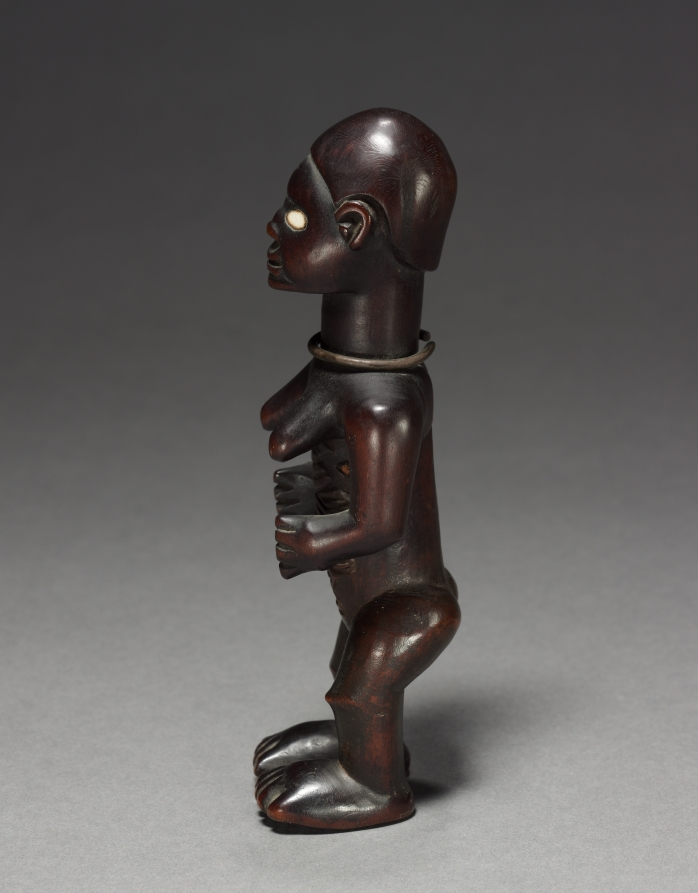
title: Female Figurine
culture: Africa, Central Africa, Republic of the Congo, Beembe-style maker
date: late 1800s-early 1900s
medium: Wood, possibly ceramic, and copper alloy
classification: Sculpture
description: Beembe figurines generally have greatly detailed anatomical and decorative features. The scarification among Beembe men and women communicated their ideas about local beauty and ethnic belonging. These figures are charged with an ancestor’s spirit through a mixture of resin and human-derived ingredients—taken from the corpse of the person they possibly portray—into a small cavity near the rectum.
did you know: The carvings in the figure’s abdomen reflect the custom of body scarification among the Beembe people.